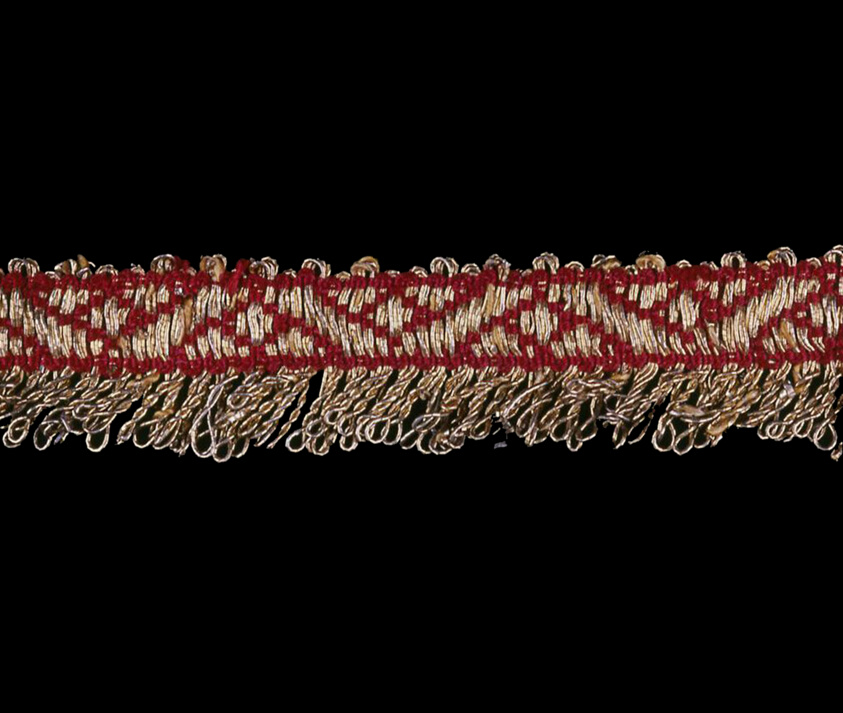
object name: Textile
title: "Renaissance" Fringe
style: Renaissance, european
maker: Italy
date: 16th century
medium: Silk and gold gilt strip wound around a silk fiber core, plain weave with supplementary patterning weft extended loop fringe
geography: Italy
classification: textile; weaving